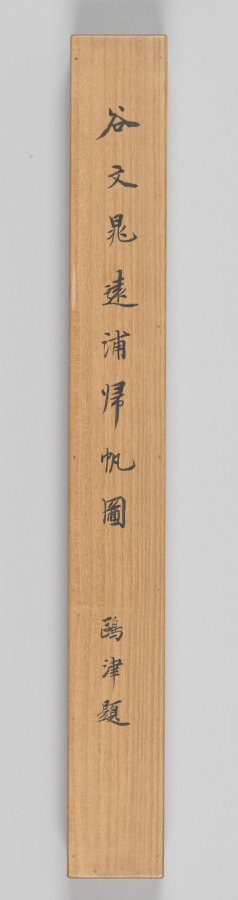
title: Returning Sails off a Distant Shores, from Eight Views of Xiao-Xiang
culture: Japan, Edo period (1615–1868)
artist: Tani Bunchō (Japanese, 1763–1841)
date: 1788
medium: album leaf remounted as a hanging scroll; ink and color on paper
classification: Painting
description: This painting was part of a set of album leaves representing the Eight Views of Xiao-Xiang, a theme originating in Chinese poetry and painting that spread to both Korea and Japan. Southern China’s Xiao-Xiang area, where the mist-covered banks of the Xiang River created a complex landscape shifting like the moods and minds of people, captured the imaginations of generations of painters and calligraphers. Inscriptions on these works suggest that they were possibly ordered by newly prominent Japanese Confucian scholars.